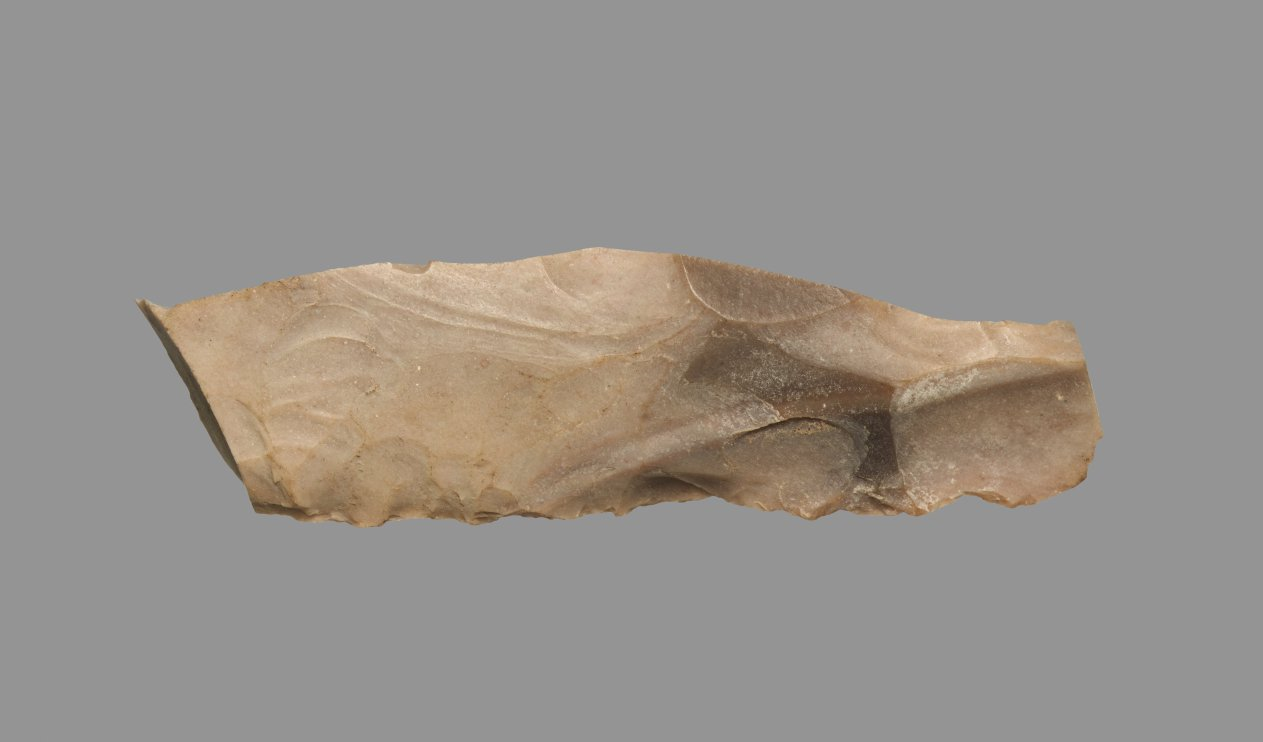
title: Sickle Blade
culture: Egypt, Middle Kingdom (2040–1648 BCE), Dynasty 12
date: 1980–1801 BCE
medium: flint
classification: Implements